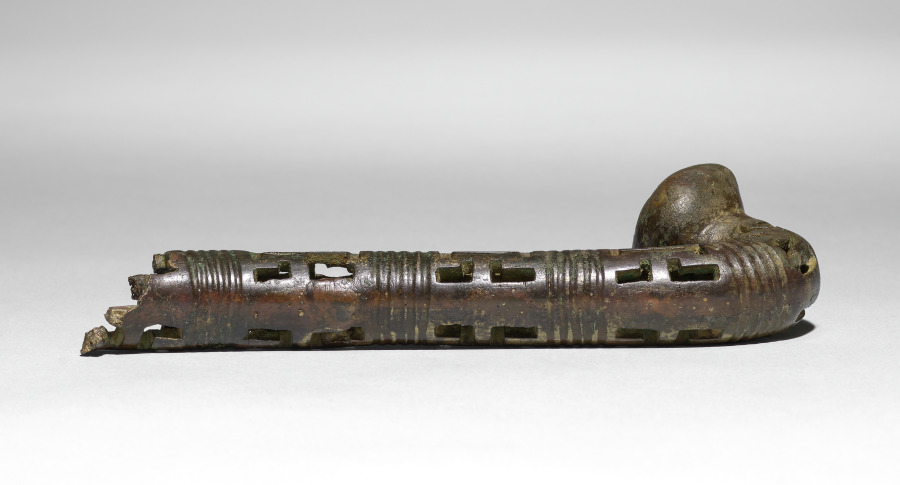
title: Tail for a Feline Incense Burner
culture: Iran, Khurasan, Seljuq period of Iran (1037–1194)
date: 1150–1200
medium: Copper alloy, cast, engraved, chased, and pierced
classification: Metalwork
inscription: Qur'an sura al-jum'ah (The Friday Congregation) 62:9-10 (on neck and spine)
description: In Iran during the 1000s and 1100s, vessels in the shape of animals gained popularity, especially as incense burners. Felines were favored in Persian art and this piece may represent a caracal, a type of lynx. The head of the creature was cast separately and is removable to fill its body with hot coals and incense. Qur’anic verses on the neck and spine remind worshippers to set work aside, attend prayer, and then disperse to seek God’s bounty. The diffusion of perfumed smoke through the burner’s pierced palmette design may have served as a sensorial reminder of this teaching.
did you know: The end of the tail is decorated with a guilloche pattern of interlacing curved lines.